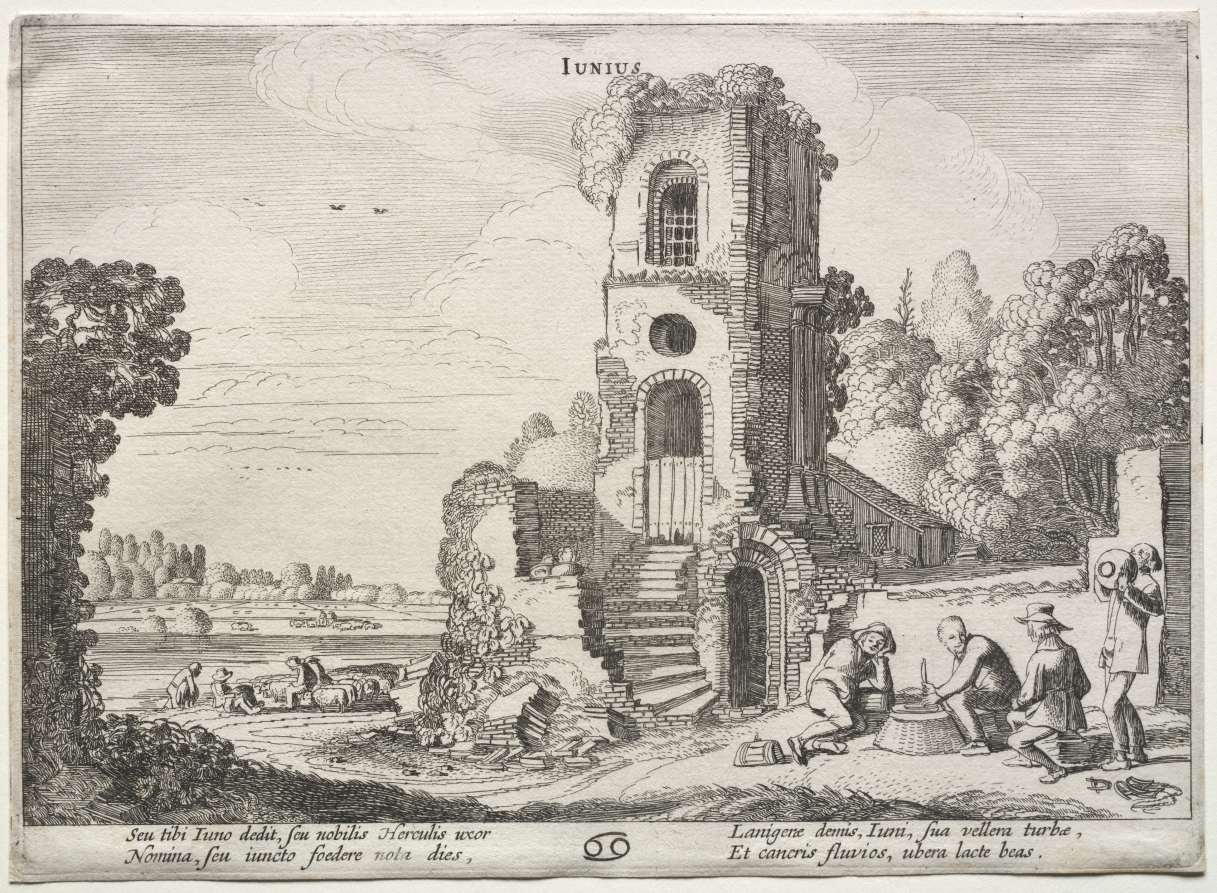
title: The Twelve Months: June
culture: Netherlands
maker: Jan van de Velde II (Dutch, 1593–1641)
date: 1608–18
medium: etching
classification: Print